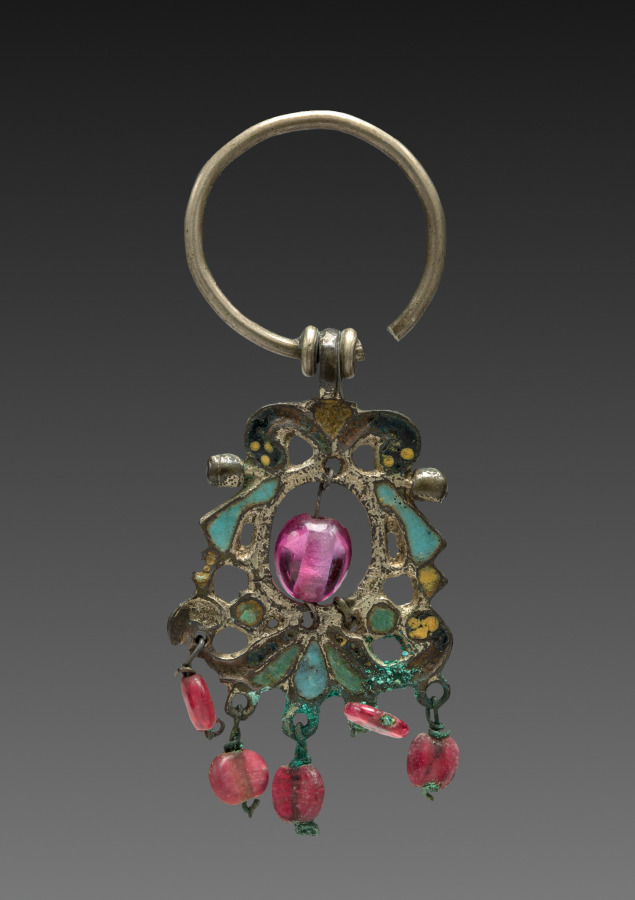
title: Earring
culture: Russia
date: 1800s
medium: silver, enamel, and red glass beads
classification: Jewelry